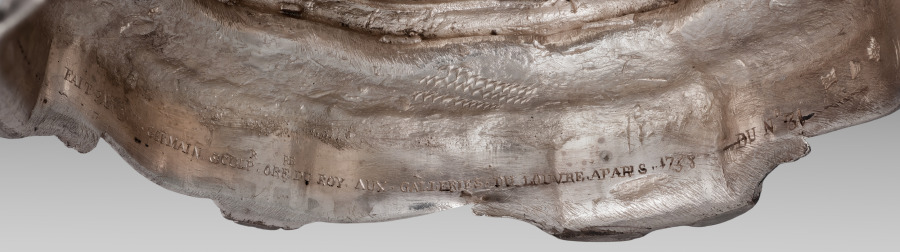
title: Candelabrum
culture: France, Paris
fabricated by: François Thomas Germain (French, 1726–1791)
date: 1757–1758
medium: silver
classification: Silver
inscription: [Maker’s mark of Francois-Thomas Germain, beneath base]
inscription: [Charge mark of Eloy Brichard, 1756−1762, beneath base]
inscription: [Warden's mark For Paris, 1757−1758, beneath base]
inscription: [Discharge mark for work intended for export, 1756−1775, beneath base]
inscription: [Discharge mark for work intended for export, 1756−1775, on base]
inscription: [Hallmarks for Saint Petersburg, on base]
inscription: [Assay mark of Ivan Frolov, on base]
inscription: [Russian standard of the French silver, on base]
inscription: [Maker’s mark of Francois-Thomas Germain, master silversmith on October 16, 1748, beneath drip pan of each three bobeches]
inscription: [Charge Mark Of Eloy Brichard, 1756−1762, beneath drip pan of each three bobeches]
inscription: [Discharge mark for work intended for export, probably 1733−1775, beneath drip pan of each three bobeches]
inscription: [Warden's mark for Paris, 1757-1758, beneath drip pan of each three bobeches]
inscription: [Russian standard of the French silver, beneath drip pan of one of three bobeches]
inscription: [Assay mark of Ivan Frolov, beneath drip pan of one of three bobeches]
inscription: [Charge mark for large work of Eloy Brichard, 1756−1762, on bayonet attachment of candelabra]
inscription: [Warden's mark for Paris, 1757-1758, on bayonet attachment of candelabra]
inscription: [Illegible mark in a square, on one bobeche]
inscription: [Engraved beneath base]: “Fait. Par. F. T. Germain. Sculp[teu]r. Orf[ev]re. Du Roy. Aux. Galleries. Du Louvre. A Paris- 1758”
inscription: [Engraved beneath base]: "Du no. 31"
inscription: [Beneath base]:"No 463"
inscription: [Russian Imperial Coat-of-arms, engraved beneath base]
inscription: [Modern inscription with black ink, beneath base]: "L5 ... 51/w-8"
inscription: [Modern inscription (illegible) in a rectangular paper label on the base, engraved. Cipher composed with two “M”’s (?) surmounted by a royal crown]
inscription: [Engraved on candelabra bayonet attachment]: "No 463"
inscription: [On candelabra bayonet attachment]: "du No 31"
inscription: [Engraved cipher with two "M"s (?) surmounted by a royal crown, on one bobeche]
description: This candelabrum is part of a pair. Its design blurs the line between function and decoration. The arms twist and curve, visually flower stems while physically supporting the candles. Though this visual unity is typical of the rococo style, the influence of the rising neoclassical style is evident in the allegorical scenes of light that decorate each candelabra’s stem.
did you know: These candelabra are part of a dinner service sent from Paris, France to Saint-Petersburg, Russia in two separate shipments, the first of which contained 270 objects for 8 dozen place settings.